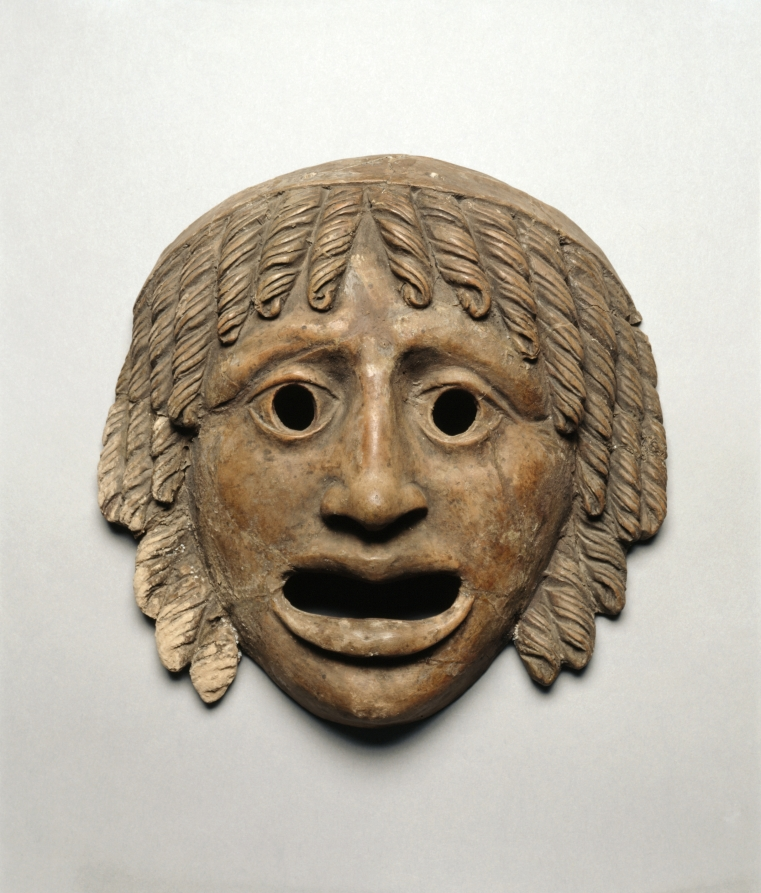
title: Mask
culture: Italy, Roman (?)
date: 1–100 CE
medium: terracotta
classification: Sculpture